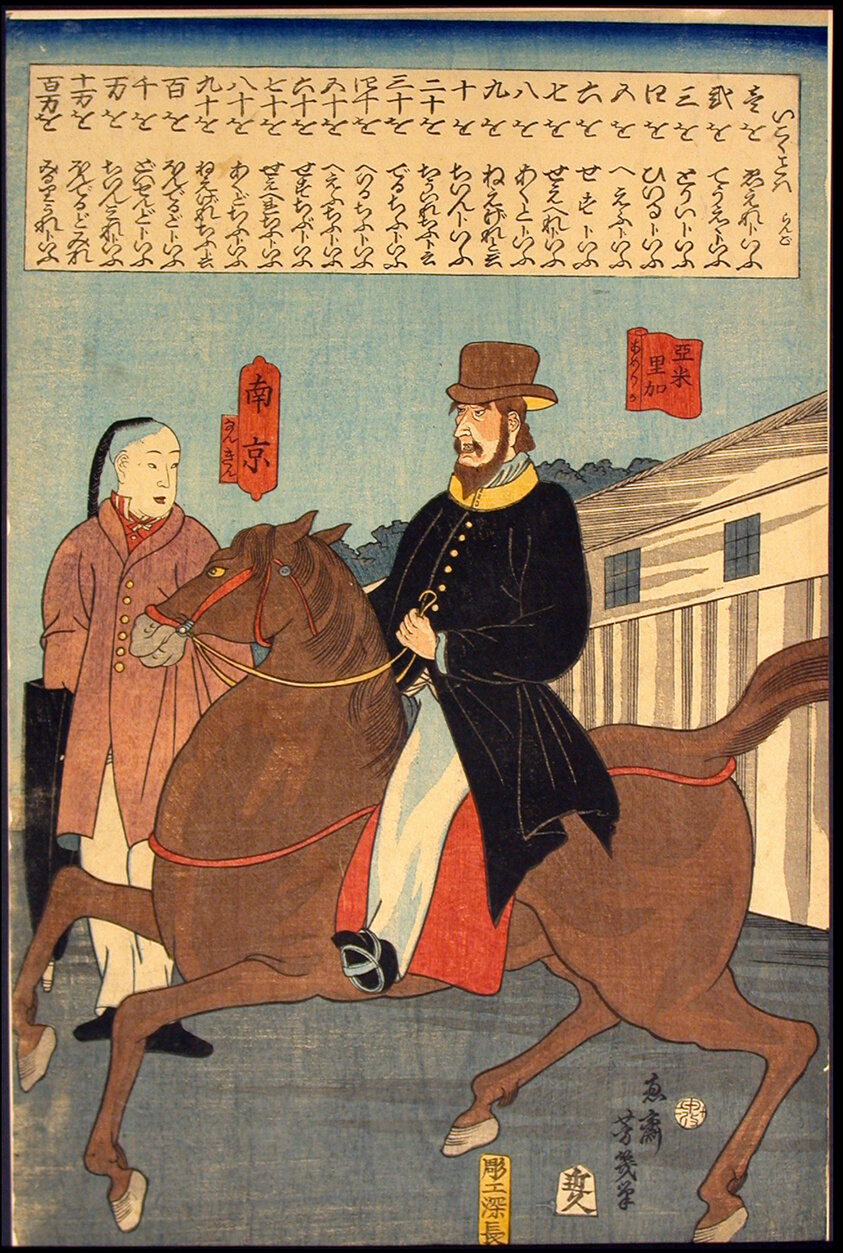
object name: Print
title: Foreign Words (Ikoku kotoba)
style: Japanese (culture or style)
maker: Ochiai Yoshiiku; Japanese, 1833–1904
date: 1860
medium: Color woodblock print; oban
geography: Japan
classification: woodblock print; print; asian art